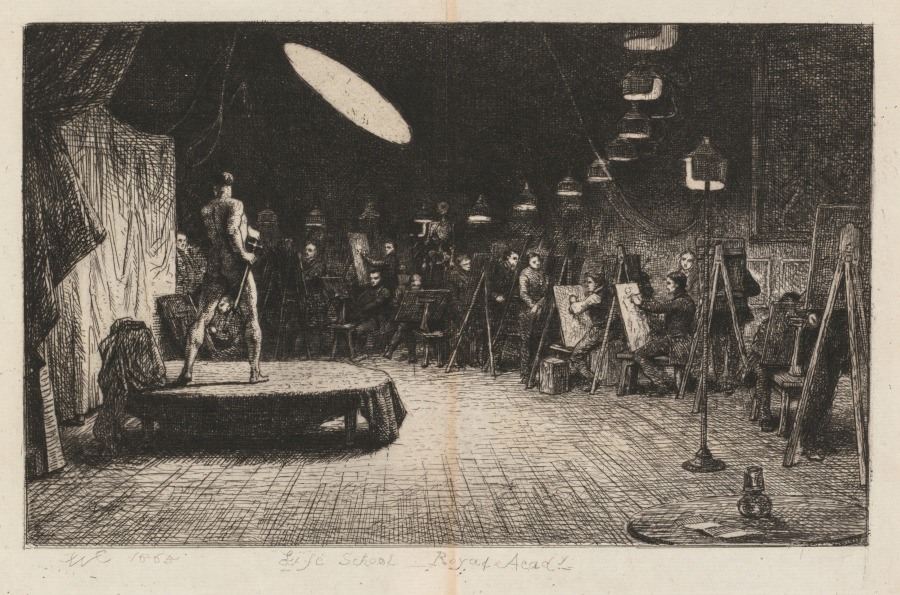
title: Life School Royal Academy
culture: England, 19th century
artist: Charles West Cope (British,1811–1890)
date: 1865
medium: etching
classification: Print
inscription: inscribed lower center in plate: Life School Royal Academy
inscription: printed under image: WC 1865 Life School Royal Academy